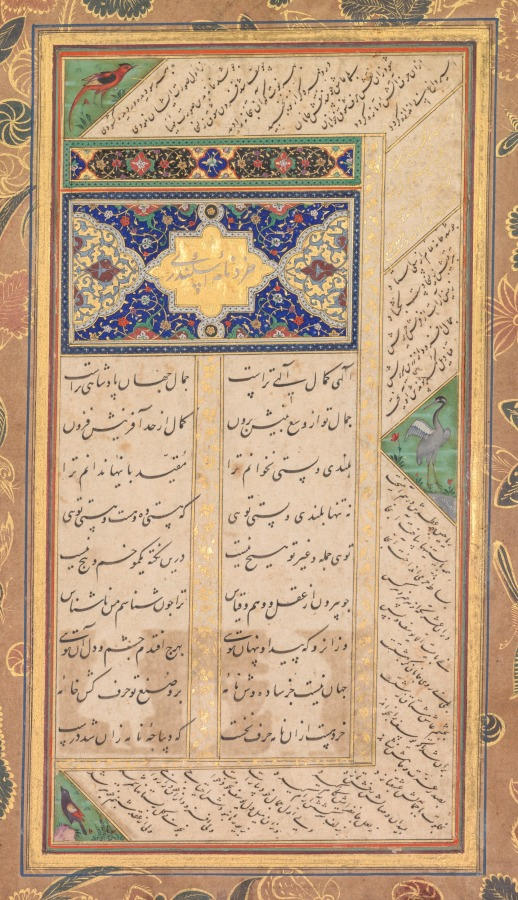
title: Illuminated page (verso), from a Panj Ganj (Five Treasures) of Abd al- Rahman Jami (Persian, 1414–1492) with two Persian masnavis: Yusuf va Zulaykha (Joseph and Zulaykha) and Khirad-nama-i Iskandari (Alexander’s Book of Wisdom)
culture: Western Afghanistan, Herat (text); Mughal India (paintings)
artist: Mushfiq (Indian, active early 1600s)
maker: Sultan 'Ali al-Mashadi (Iranian, 1430–1520)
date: 1603–7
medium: Gum tempera, ink, and gold on paper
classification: Painting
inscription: [[Persian title in gold, nasta’liq script]] Khirad-nama-I Iskandari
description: This section of text from Jami’s poem of Joseph and Zulaykha, written diagonally in the margins, describes the beauties of Zulaykha’s house, in which she intends to seduce Joseph. It includes the following verses: Jeweled lamps on the walls were hung / And odorous herbs were beneath them flung. / She gathered together all things most fair, / And unrolled the carpet of pleasure there. / But amid the charms of the sumptuous hall / She longed only for Joseph, far dearer than all. / A heavenly palace is dark and dim / To a lover whose darling is far from him. The longing of Zulaykha for Joseph metaphorically describes an imperfect devotee’s mystical love for God. With patience, forbearance, and virtuous actions, unification with the divine will eventually occur, even for the most flawed among us. On this page also begins the Khirad-nama-i Iskandari (Alexander’s Book of Wisdom), another of the five narrative poems that make up the Panj Ganj.